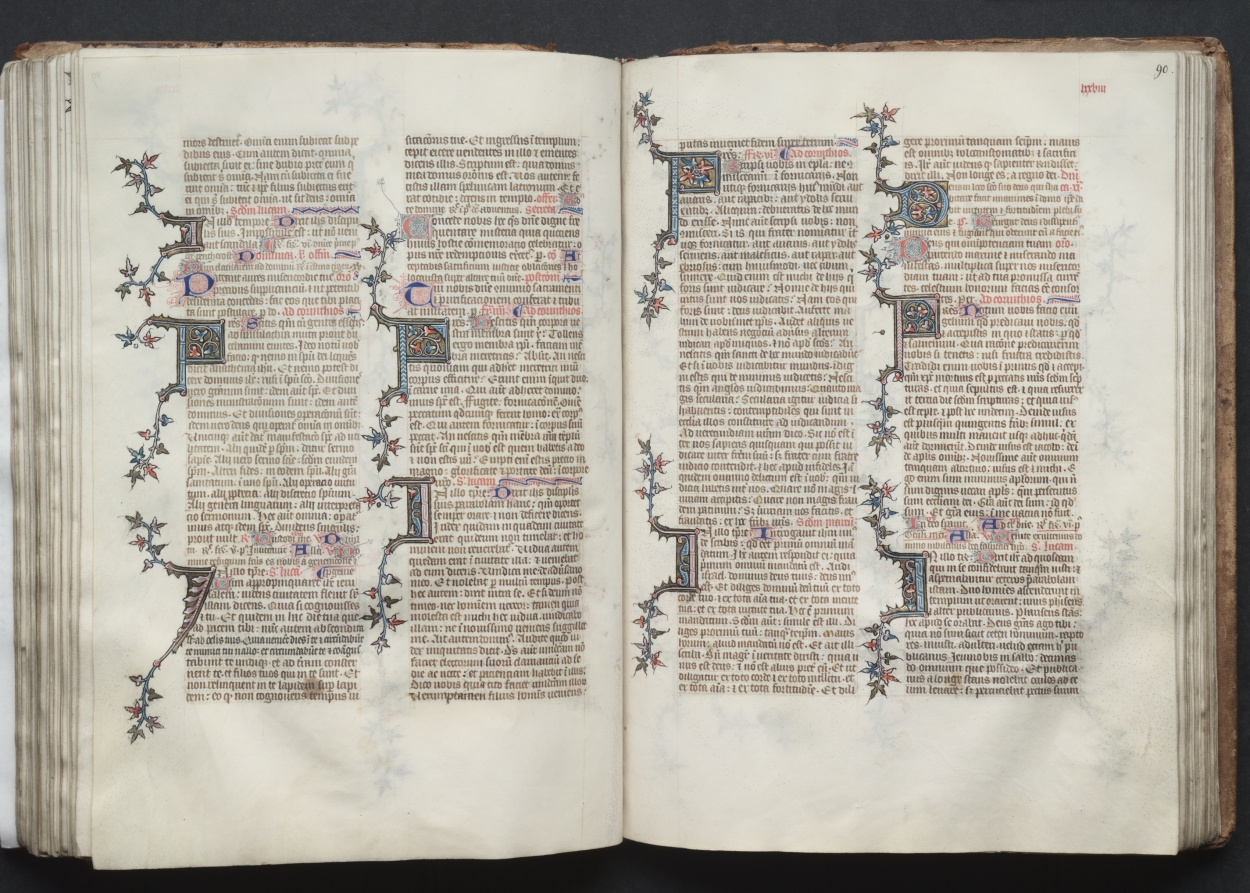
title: The Gotha Missal: Fol. 89v, Text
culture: France, Paris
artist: Master of the Boqueteaux (French)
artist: and Workshop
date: c. 1375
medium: ink, tempera, and gold on vellum; blind-tooled leather binding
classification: Bound Volume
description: The style and quality of this manuscript's decoration is typical of deluxe Parisian books made for aristocratic or royal patrons. Most of the book's decoration appears to be the work of the Master of the Boqueteaux, an artist active at the court of King Charles V (died 1380). His style was apparently shared by a number of book illuminators working in and around Paris. It is very possible that the Gotha Missal belonged to Charles V, but is not provable because the manuscript has no royal portraits and lacks a colophon. Given the book's magnificent decoration, however, it would seem that it was produced for a Valois prince, if not for the king himself. The manuscript receives its name from the German dukes of Gotha, its later owners.